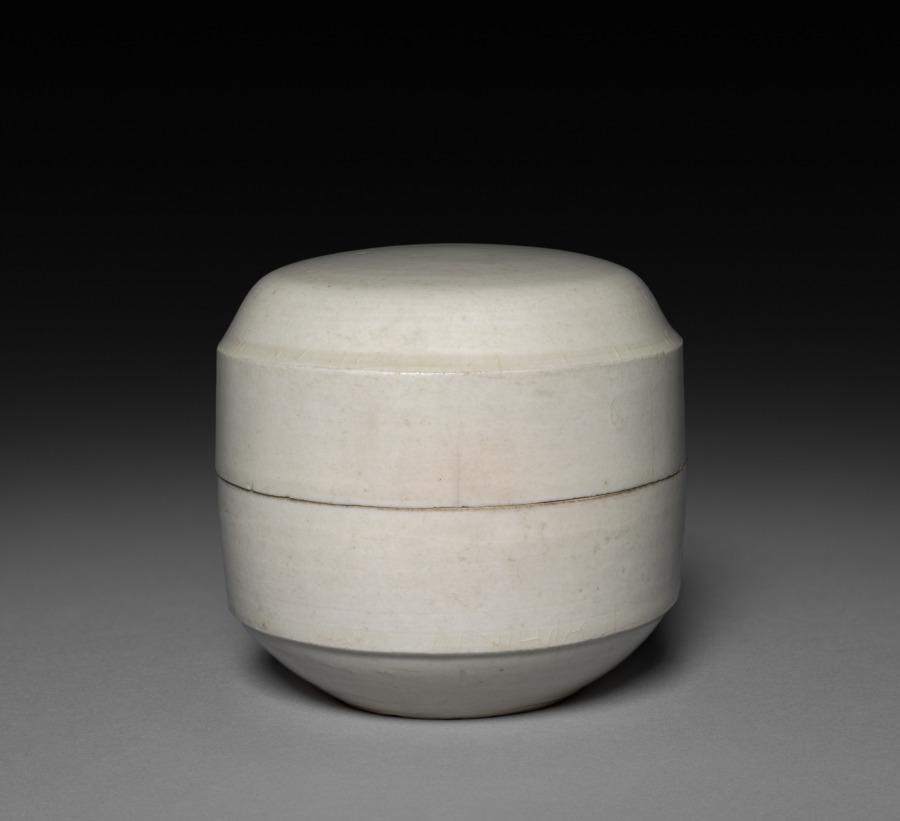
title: Covered Box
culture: China, Hebei province, Quyang, Northern Song dynasty (960–1127)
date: 1000s–1100s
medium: white porcelain, Ding ware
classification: Ceramic